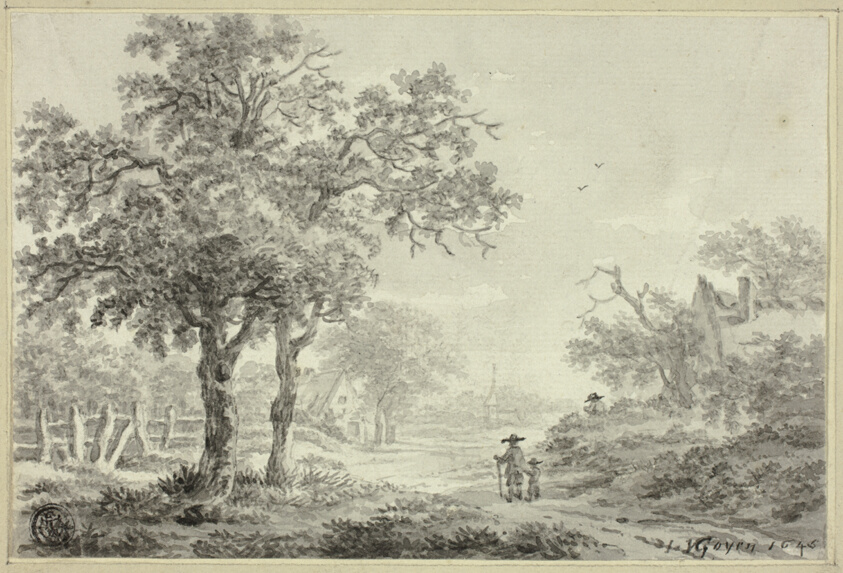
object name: Drawing and Watercolor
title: Man and Boy Walking Down Village Road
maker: Jan van Goyen (Dutch, 1596-1656); or Paul Liender (Dutch, 1731-1797)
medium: Black chalk, with brush and gray wash, on ivory laid paper, laid down on cream laid paper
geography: Holland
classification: ink or chalk wash; drawings (visual works); prints and drawing